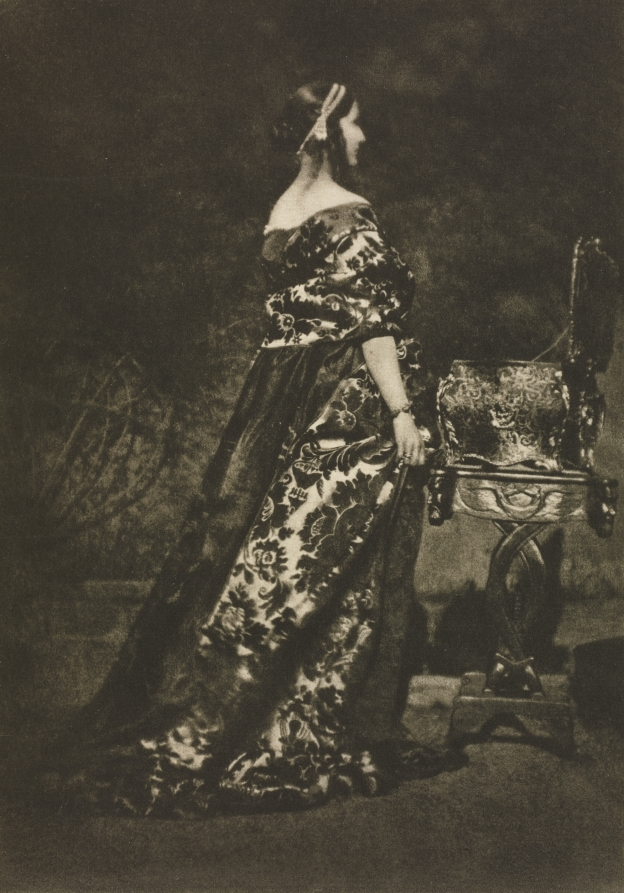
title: Camera Work: Portrait - The Gown and the Casket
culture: England, 20th century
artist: David Octavius Hill (British, 1802–1870)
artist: and Robert Adamson (British, 1821–1848)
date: 1909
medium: photogravure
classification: Bound Volume